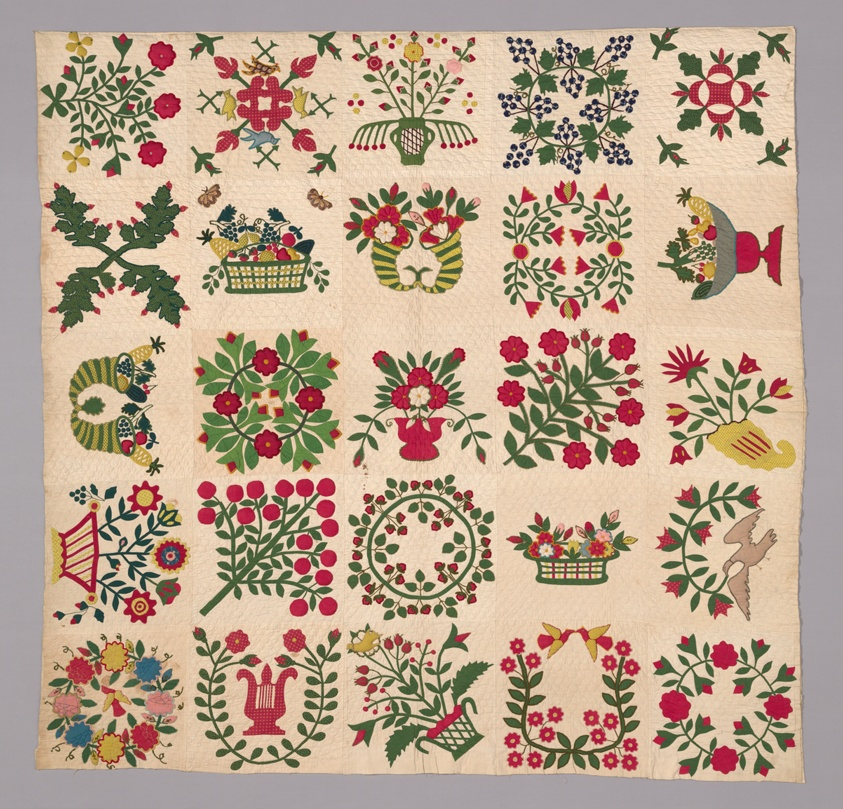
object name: Textile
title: Bedcover (Album Quilt)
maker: United States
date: 1845/50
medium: Cotton, plain weave; quilted; appliquéd with plain weaves, some printed, some glazed, some padded; embroidered in buttonhole, chain, satin, and straight stitches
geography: United States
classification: textile; needlework - quilt